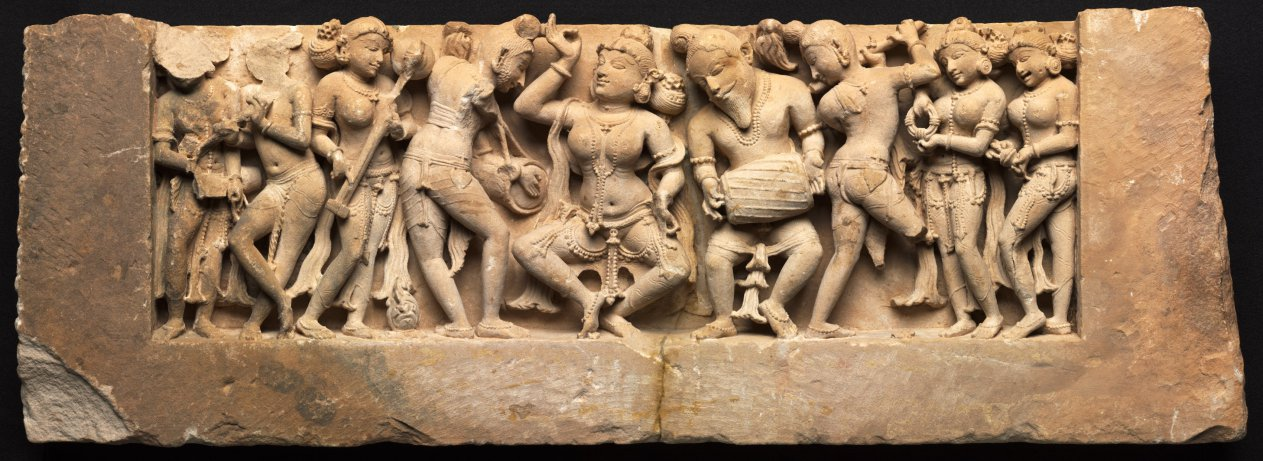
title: Frieze with Dancer and Musicians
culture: Northwestern India, Rajasthan, Sikar, Harshagiri, 10th century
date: c. 973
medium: sandstone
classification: Sculpture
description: A dancer, who strikes a pose in the center, is accompanied by a full orchestra of musicians in lively variegated poses. At the far left, a woman plays the cymbals, her mouth open in song. Twisting turning postures of figures wrought in high relief with little background space behind them are characteristics of Indian sculpture from the medieval period. Music and dance were important components of devotional temple activities; they were considered as pleasing to the divinity and attractive for devotees as the works of sculpture and architecture.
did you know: The twisting, dynamic postures of the musicians in this frieze may visually echo the joyful music they are playing together.